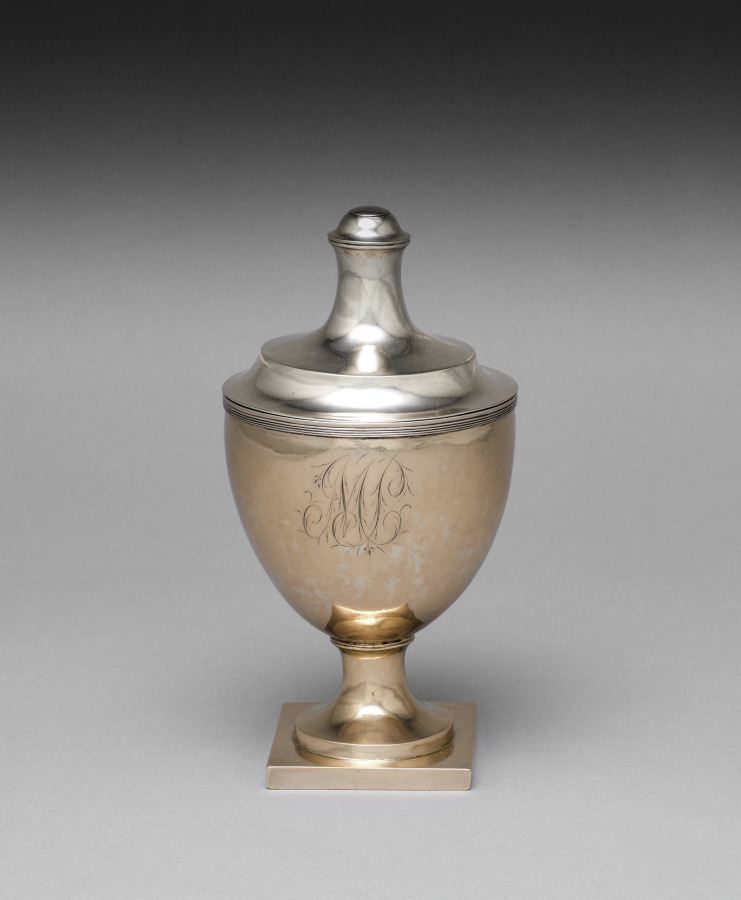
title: Covered Sugar Bowl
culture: America, Pennsylvania, Philadelphia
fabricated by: William Haverstick (American, 1756–1823)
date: c. 1800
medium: silver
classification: Silver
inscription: Engraved on side: "MJ".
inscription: Scratched underside: "109".